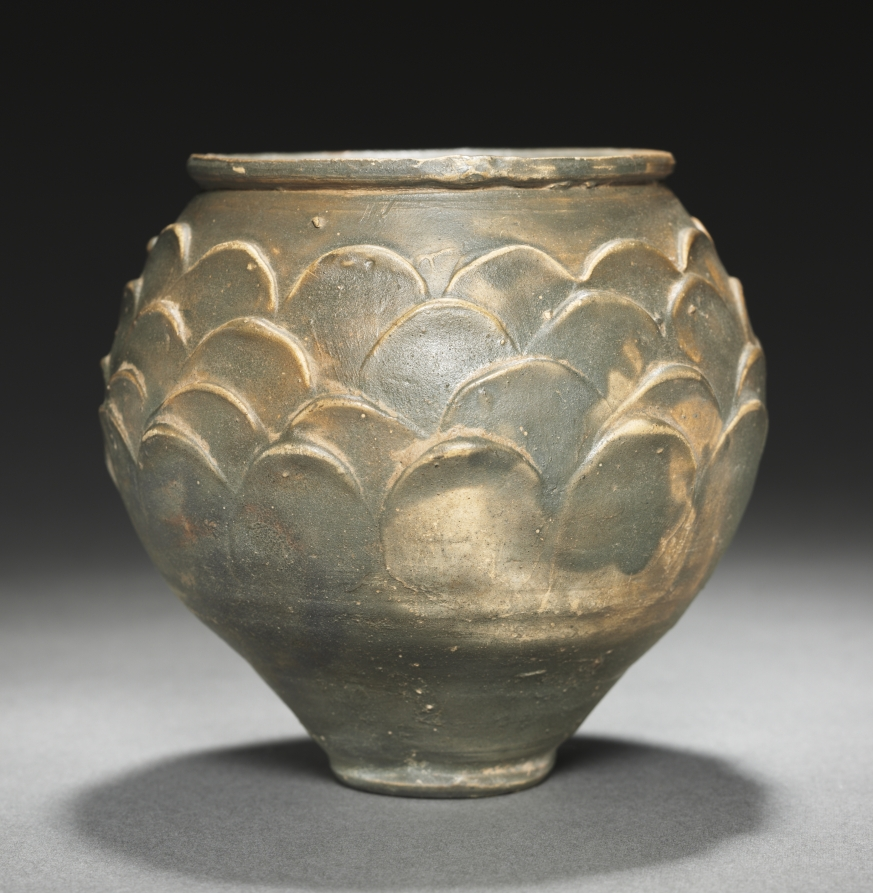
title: Beaker with Scale Pattern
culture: Rhenish (Cologne), Gallo-Roman, 1st Century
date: 1–100 CE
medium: reddish ware with dark gray burnished slip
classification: Ceramic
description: The dark brown glaze on the exterior of this beaker is patchy and irregular, allowing the light red clay beneath to show through. The glaze is especially light on the ridges of the raised scales that decorate the upper body of the vessel, arranged in four offset rows. The pattern was created by applying thick clay slip to the surface of the beaker after it was removed from the potter’s wheel.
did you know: Several textile fibers were found inside this beaker, suggesting that it may have contained an object or objects wrapped in cloth when it was buried.